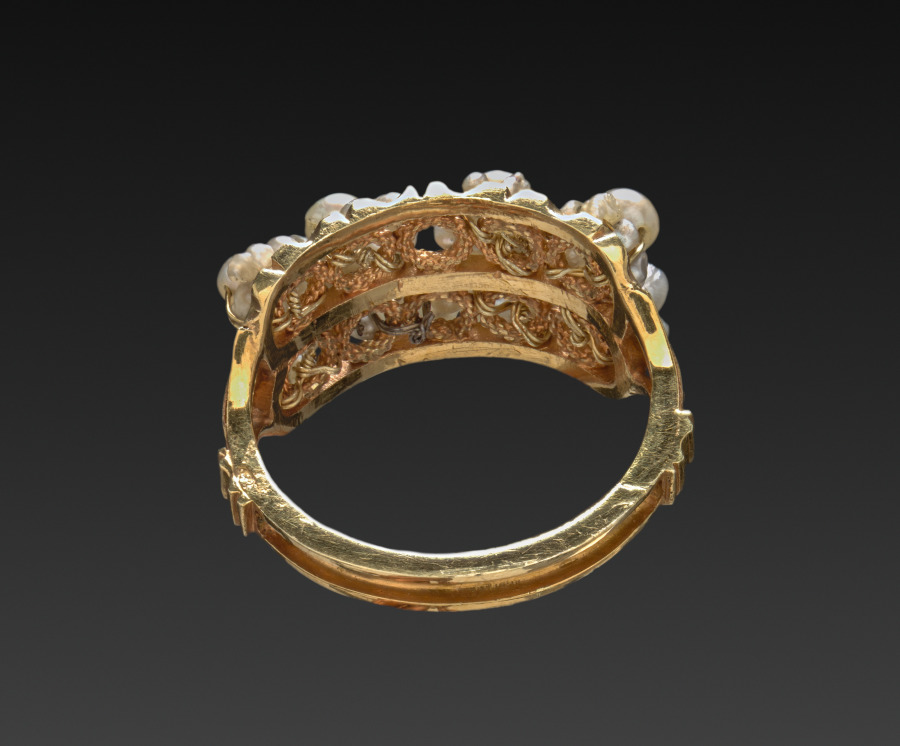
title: Ring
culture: Italy, late 19th century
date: late 1800s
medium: gold band set with seed pearls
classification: Jewelry